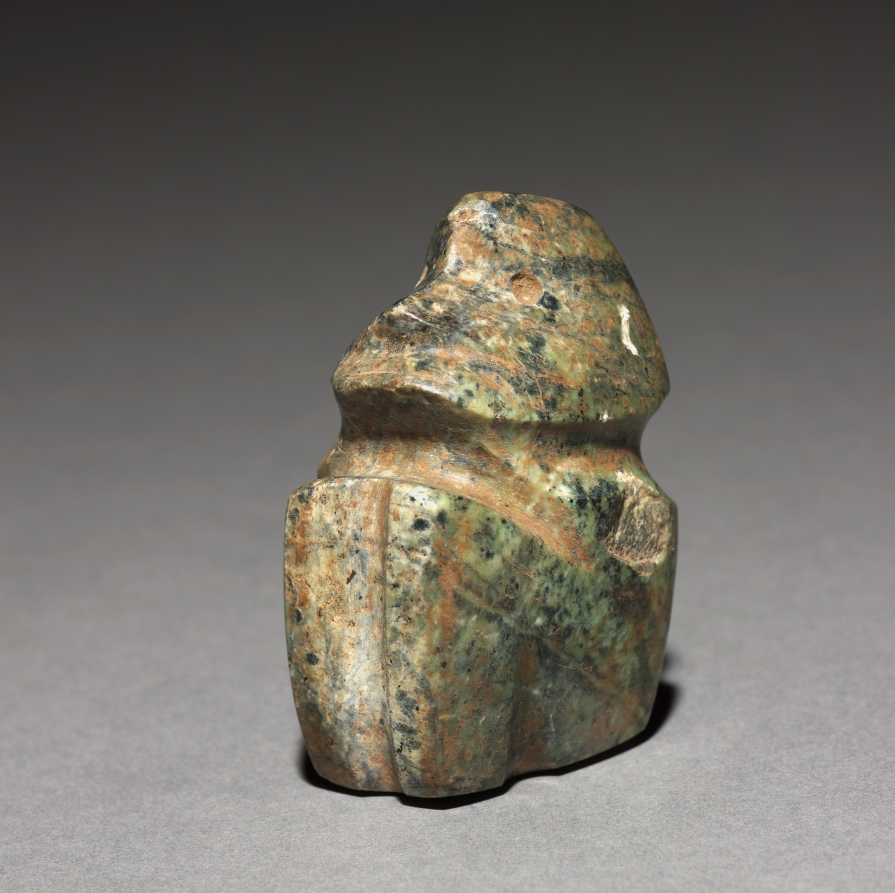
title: Seated Figure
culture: Mesoamerica, Mexico, Guerrero, Mezcala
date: 100 BCE–300 CE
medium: serpentine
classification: Sculpture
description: The Mezcala style takes its name from a river in its homeland, the Guerrero region of western Mexico. The style is known for small-scale sculptures characterized by sleek abstraction and often made of greenstone, one of the most precious materials that Mesoamerican artists worked. Unfortunately, little is known of the sculptures’ meanings and archaeological contexts.